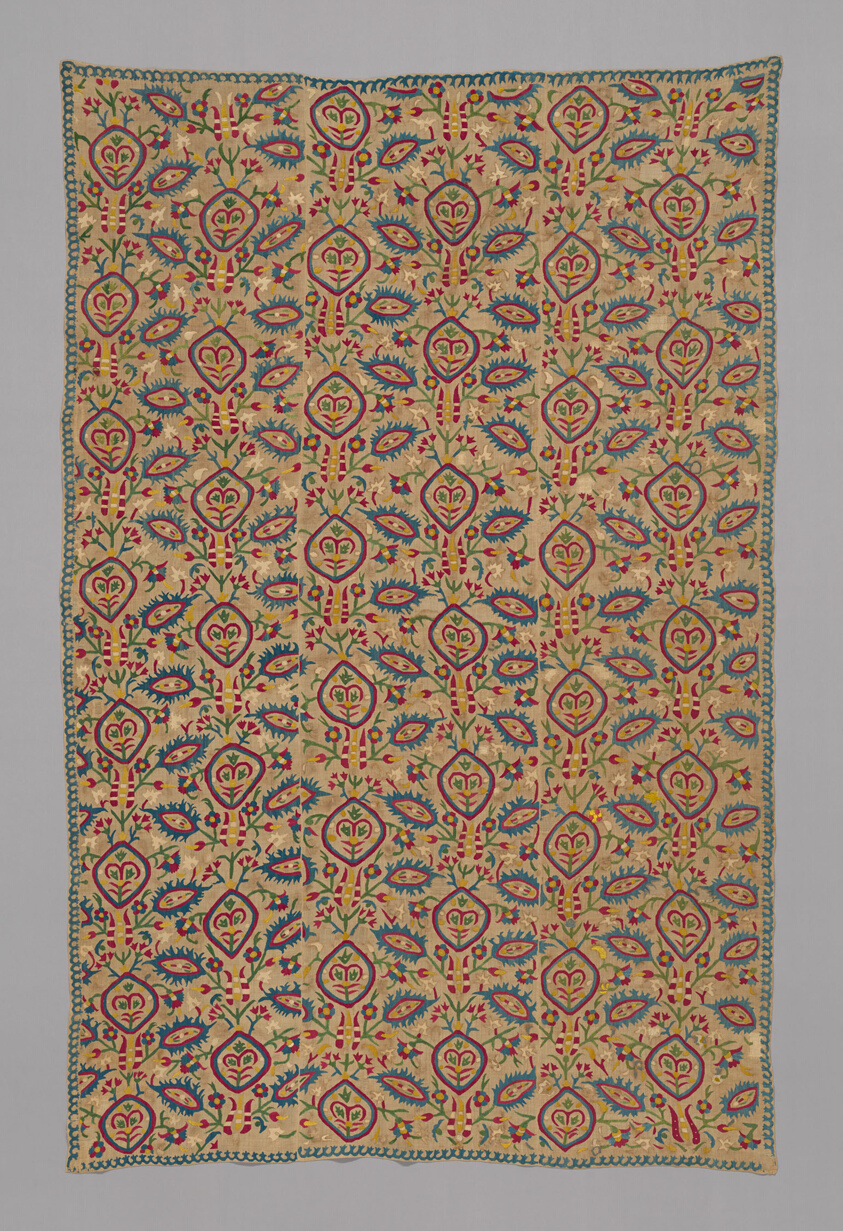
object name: Textile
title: Cover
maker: Turkey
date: 17th/18th century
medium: Linen; embroidered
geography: Turkey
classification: textile; needlework (visual works); weaving; weaving - coverlet